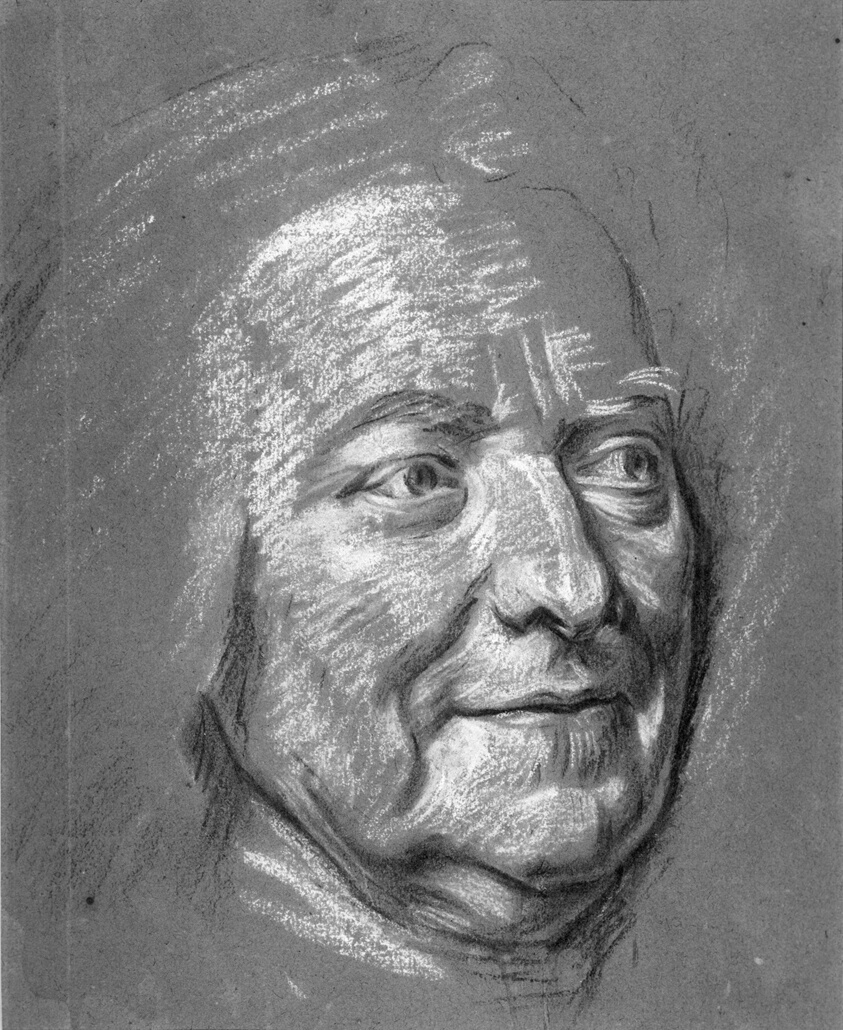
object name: Drawing and Watercolor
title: Portrait of M. Louis Silvestre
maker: Maurice Quentin de Latour (French, 1704-1788)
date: c. 1753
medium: Black and white chalks with traces of blue and red pastels on greenish-brown paper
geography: France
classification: chalk; drawings (visual works); prints and drawing